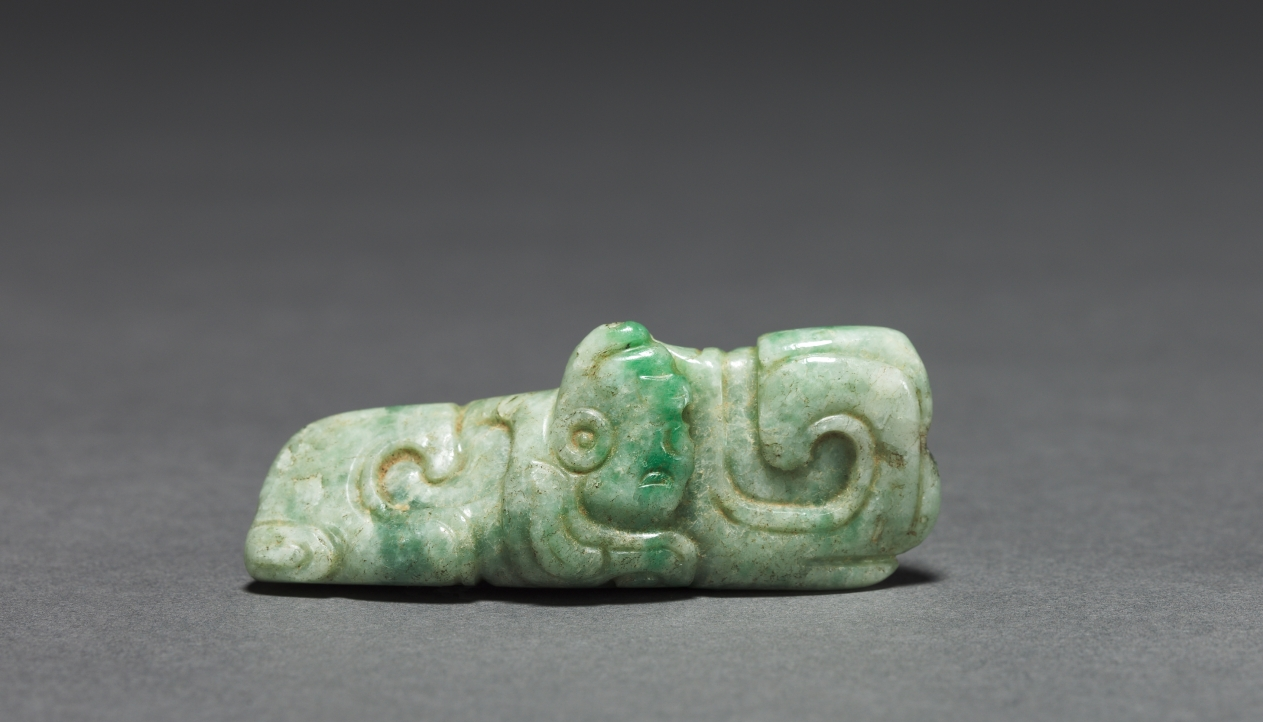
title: Pendant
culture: Maya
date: 250–900 CE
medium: jadeite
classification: Jade